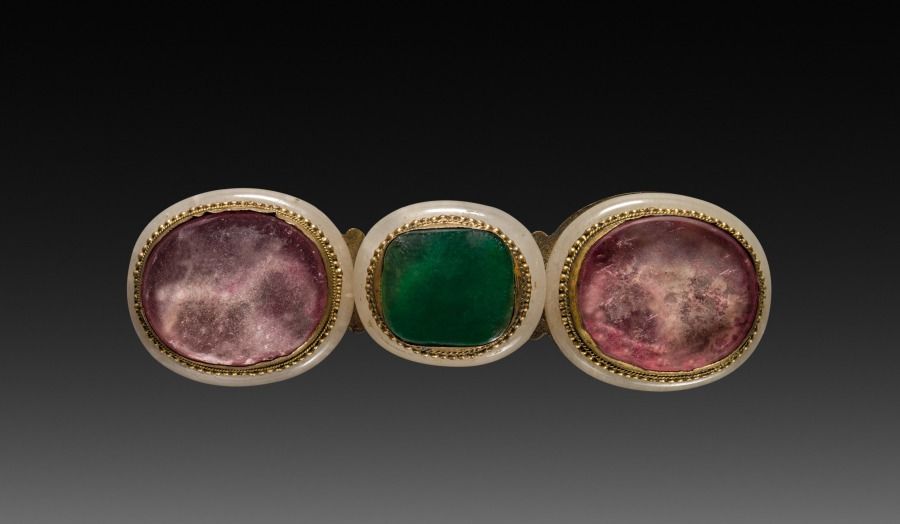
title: Buckle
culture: China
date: 1900s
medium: brass with veneer of white jade, set with three stones of jade and quartz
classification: Jewelry